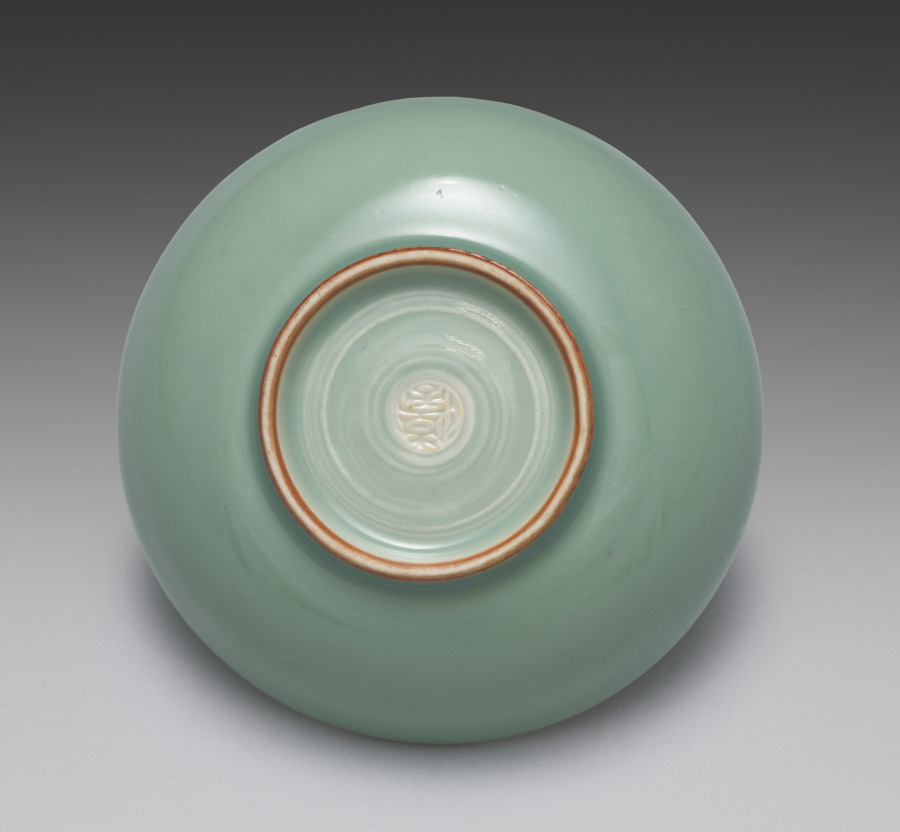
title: Dish from Dishes with Ivy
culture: Japan, Meiji period (1868–1912)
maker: Seifū Yohei III (Japanese, 1851–1914)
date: 1893–1914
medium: One from a set of five dishes; porcelain with green glaze and molded designs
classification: Ceramic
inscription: 清風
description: Yohei III’s main output for his sophisticated clientele was in the form of tea sets and dining sets. He often produced in pairs, sets of five, or sets of ten. This set of five dishes with a green glaze and designs of ivy vines in very low relief has unfortunately lost its box. These dishes are slightly larger than the other dishes, like CMA 2022.187, and so may have been not saucers but rather small plates for meals.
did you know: In his career, Seifū Yohei III created a range of dishes in green glazes.